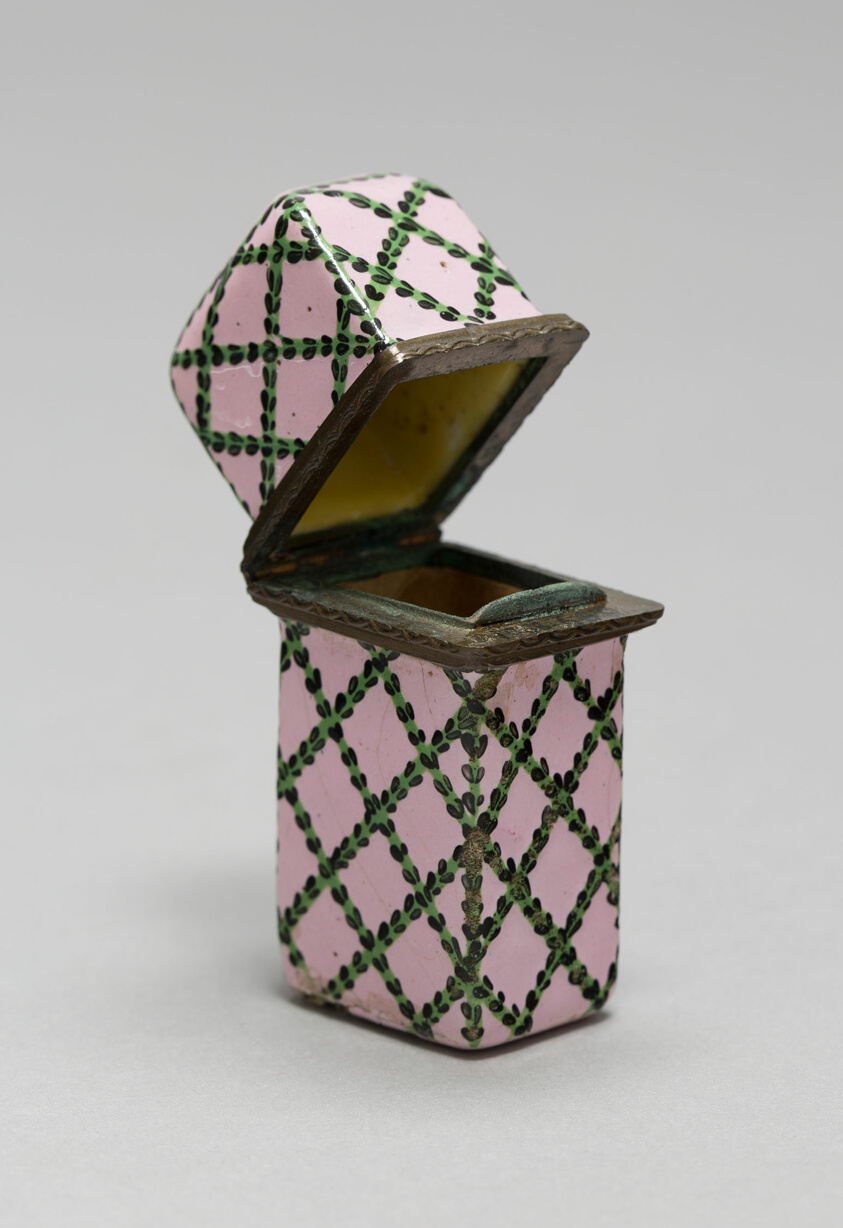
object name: Metalwork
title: Box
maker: South Staffordshire, England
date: c. 1775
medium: Metal and enamel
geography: South Staffordshire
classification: enamel; metalwork